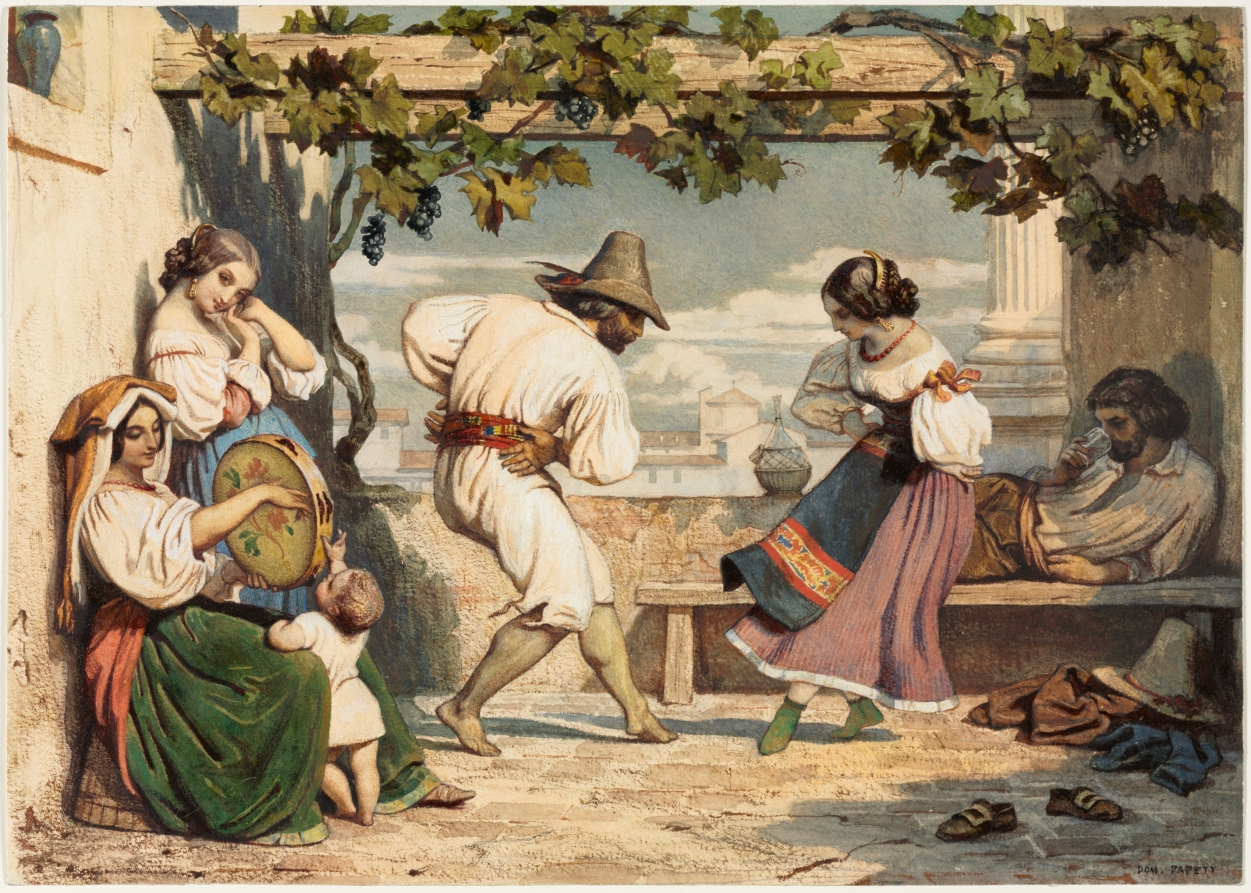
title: La Saltarelle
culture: France, 19th century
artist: Dominque Louis Papety (French, 1815–1849)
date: 1800s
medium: watercolor and gouache with selective gum glazing over a faint graphite underdrawing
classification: Drawing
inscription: Signed in black ink, lower right: Dom. Papety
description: During the 15th century, La Saltarelle was a popular Neapolitan court dance named for its particular leaping step, after the Italian verb saltare (to jump). Lively and merry, it was played in a fast triple meter. In the 19th century, the saltarello was featured in the Carnival celebrations preceding Lent in Rome. After witnessing the Roman Carnival of 1831, the German composer Felix Mendelssohn incorporated the dance into the finale of one of his masterpieces, the Italian Symphony.